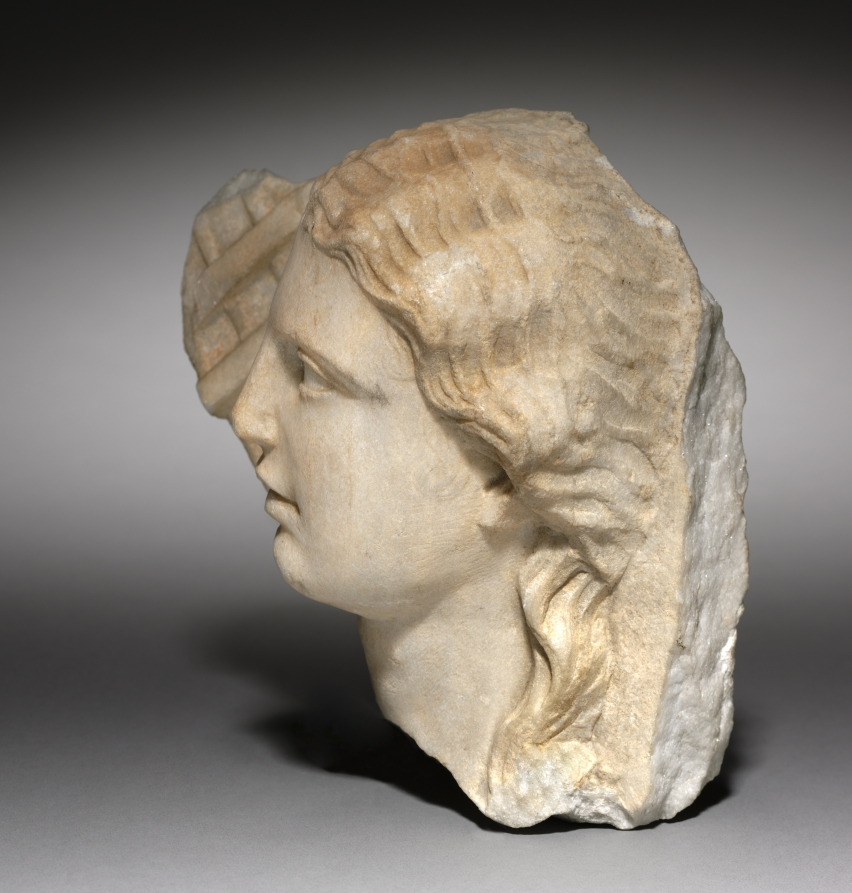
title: Head of a Woman Holding a Sistrum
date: 150 BCE–50 CE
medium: marble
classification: Sculpture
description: This head of a woman was likely originally part of a stele or grave marker. The woman sits in partial profile holding a sistrum close to her head, possibly making music. A sistrum is a type of rattle that originated in ancient Egypt and spread to the Greek world. (View a sistrum in the collection here: 1920.1990.) The sistrum likely signaled to ancient viewers that the woman on the grave marker was a worshiper of the Egyptian goddess Isis, whose cult spread throughout the Mediterranean after Alexander the Great took over Egypt.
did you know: A sistrum (rattle) can have either three or four branches through the body of the instrument.